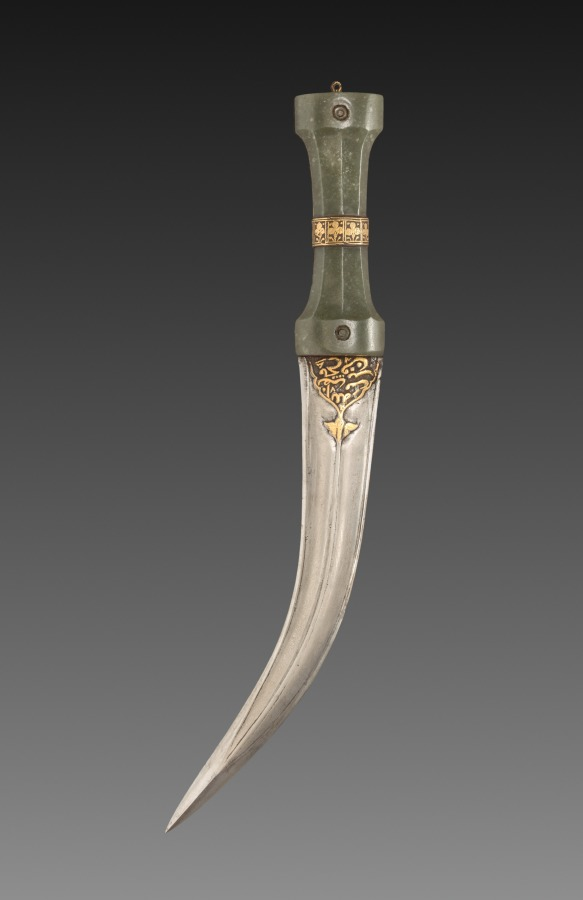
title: Dagger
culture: India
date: 1700s–1800s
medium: Jade hilt with iron and gold; steel blade with iron and gold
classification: Arms and Armor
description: Daggers with curved blades, known as khanjar, were worn tucked into the belt as one of the basic accessories for Mughal men. An all-purpose knife that could be used in hunting or fighting, the khanjar was also a visible status symbol. The use of jade and gold indicates that this dagger was owned by a member of the court. The gold inscriptions on the blade, just under the hilt, are quotations from the Qur’an, the most sacred book for Muslims. On one side is the opening line: “In the Name of God the Merciful and the Compassionate,” and on the other is a popular verse from chapter (sura) 61: “Help comes from God, and Victory is imminent.”